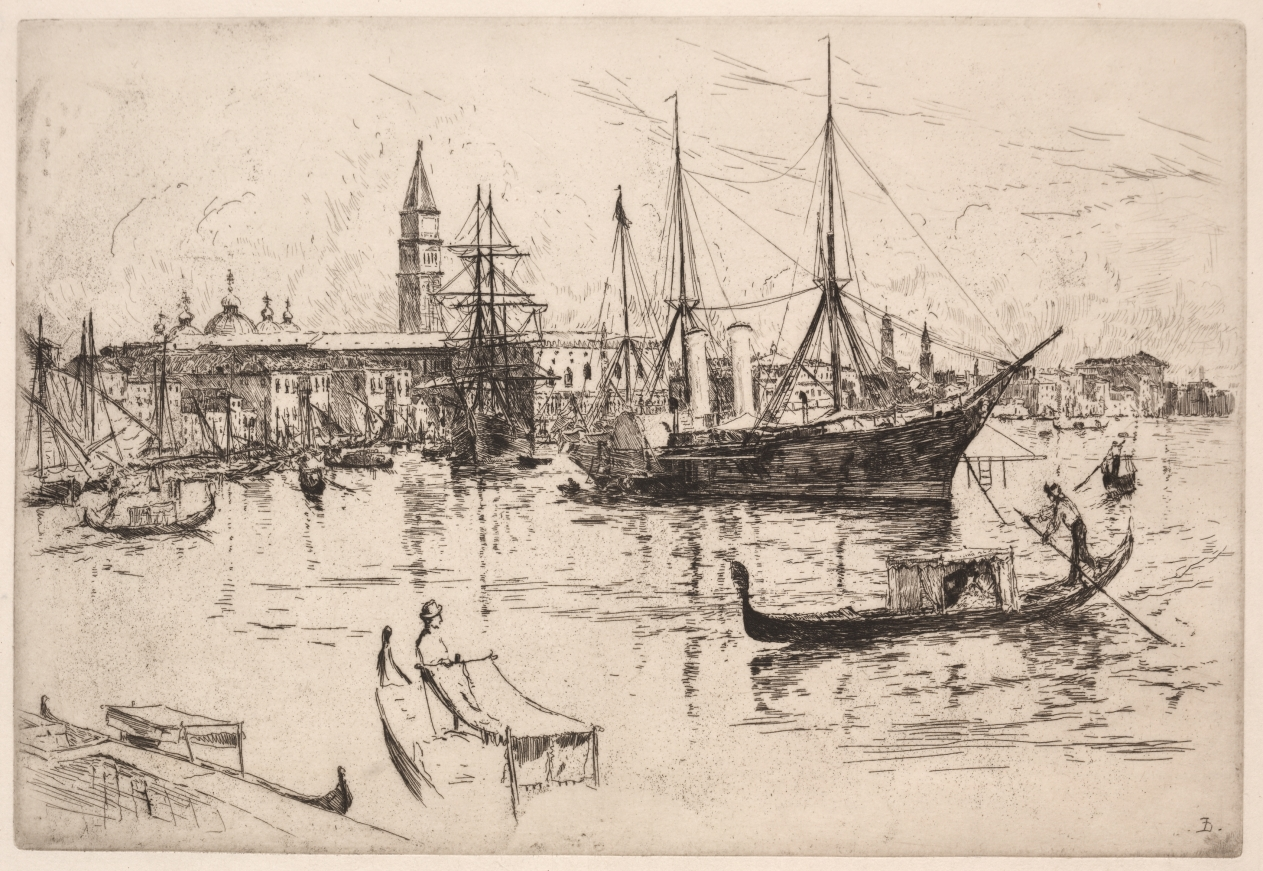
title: Laguna, Venice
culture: America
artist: Frank Duveneck (American, 1848–1919)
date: 1880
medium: etching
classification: Print